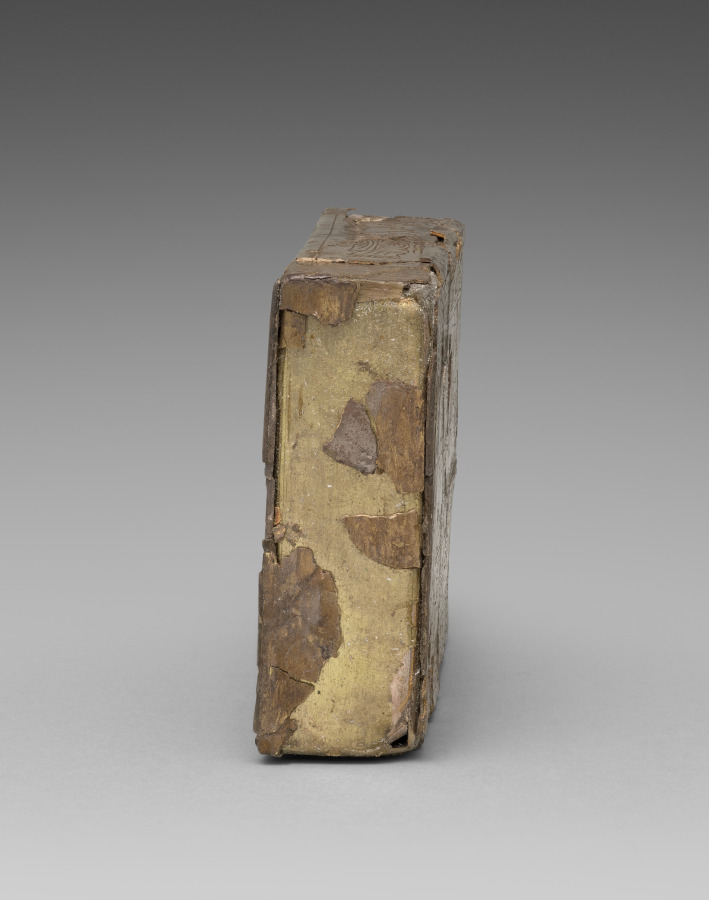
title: Buddhist Sutra Container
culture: Korea, Goryeo dynasty (918–1392)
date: 1100s-1200s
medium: gilt silver with incised Buddhist designs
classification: Metalwork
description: This container was designed to hold sutras, or Buddhist sacred texts. The Four Heavenly Kings, one for each of the cardinal directions, are incised on the exterior of the container. Images of the Four Heavenly Kings can often be found on Korean containers for sacred relics and sutras, and are symbolic of the wish to preserve the Buddha’s teachings.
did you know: This container was designed to hold a portable Buddhist sacred text.